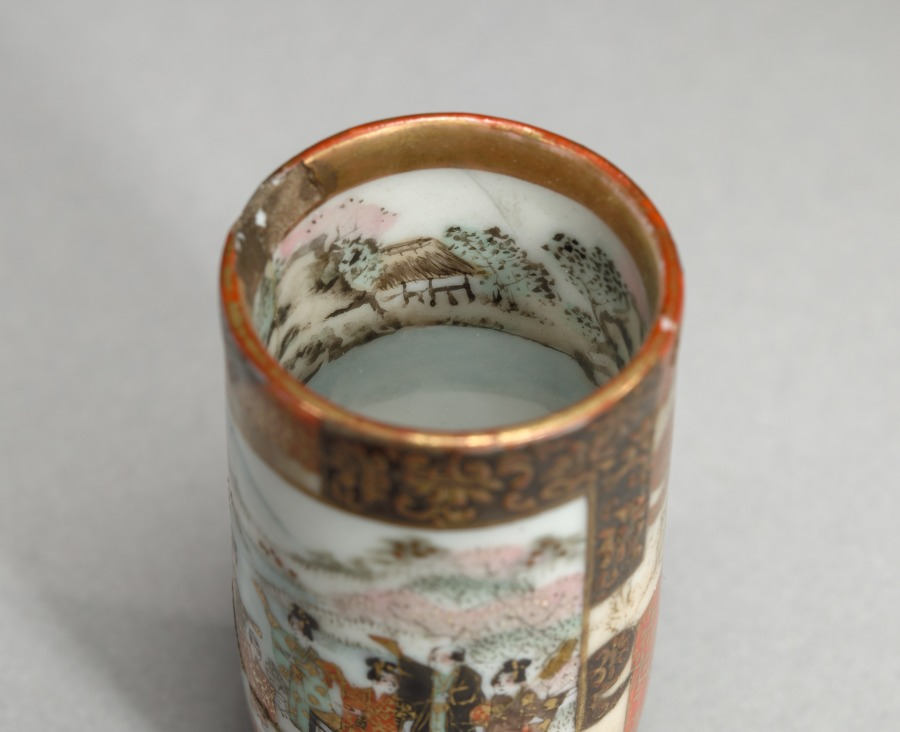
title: Miniature Vase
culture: Japan, Edo period (1615–1868) to Meiji period (1868–1912)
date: 1800s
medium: overglaze porcelain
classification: Ceramic